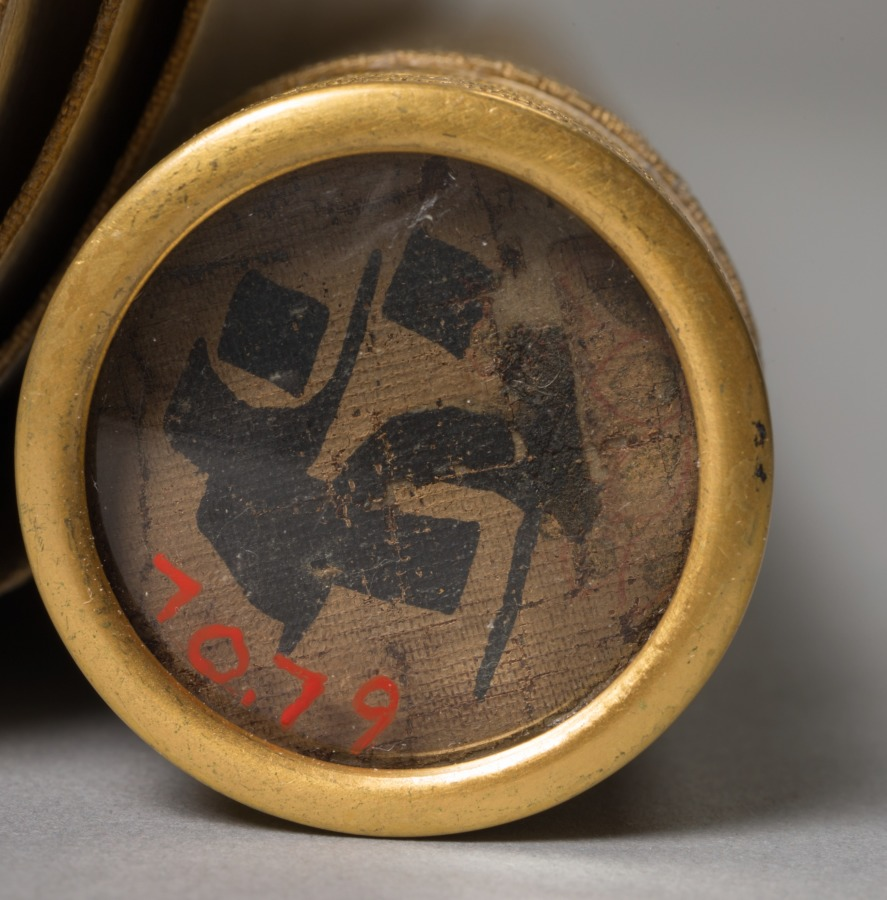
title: Eleven-Headed Kannon (Jūichimen Kannon)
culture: Japan, Kamakura period (1185–1333)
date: 1200s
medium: hanging scroll; color and cut gold (kirikane) on silk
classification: Painting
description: The Eleven-Headed Kannon, a deity of mercy and compassion in the Buddhist pantheon, was introduced into Japan in the 600s. By the 700s it had gained in popularity among an increasing number of believers, a condition it enjoyed until the end of the Kamakura period. The modest size and high quality of the materials apparent in this work indicate its use as a private devotional image. An earlier restoration of this painting included the use of an entire silk backing layer rather than silk patches with a paper backing. The tension that resulted between these two layers of silk, one old and the other recent, caused serious cracking to occur in the painting's surface. Moreover, the silk backing had been dyed a dark tone which did not enhance the appearance of the painting, although it did help hide damaged areas in the surface silk. Now two layers of backing paper support the painting, with its carefully fitted silk patches. These are toned slightly differently from the original surface values so that viewers can distinguish between the original and the modern restored areas. The original metal fittings have also been cleaned and reused. Other replacement fittings were deemed inappropriate for this early religious image and so new, specially designed ones are now in place.